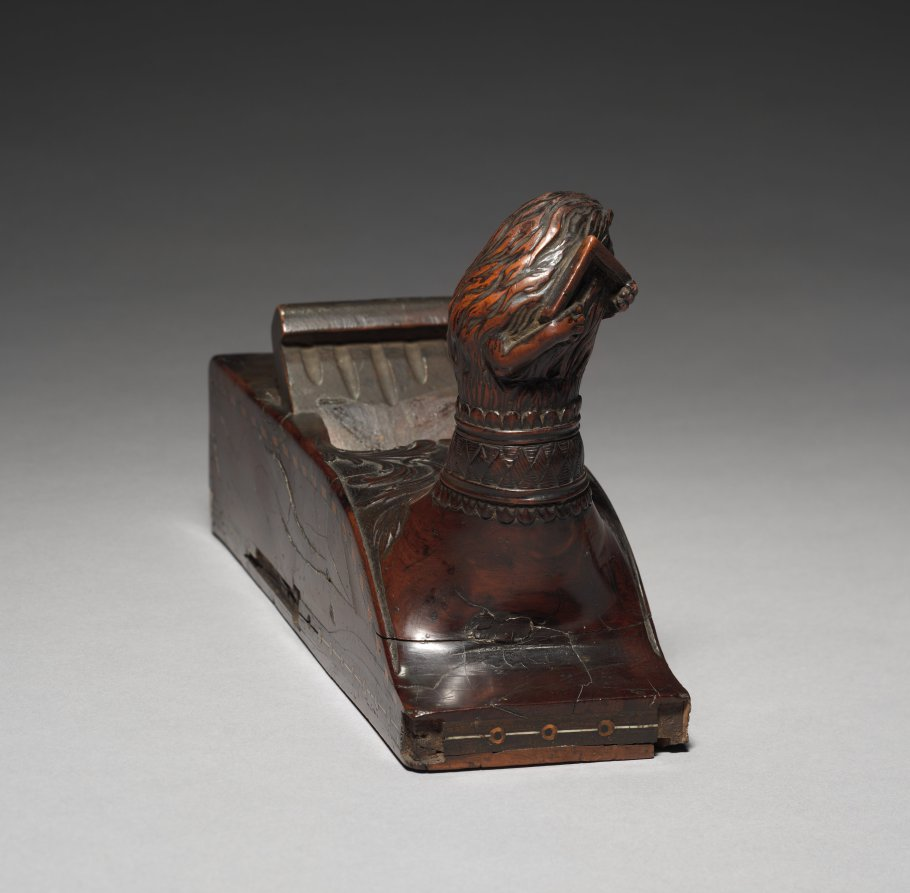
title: Carpenter's Plane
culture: Italy, late 17th century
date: late 1600s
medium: wood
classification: Tool